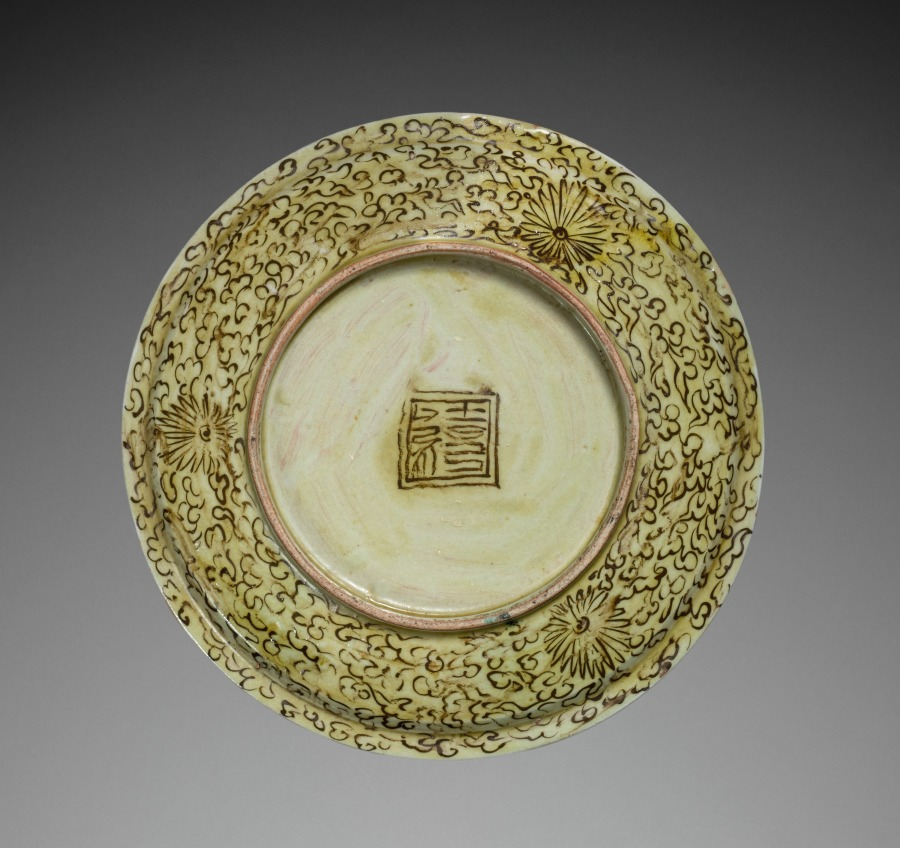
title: Plate with Fan Designs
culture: Japan, Edo period (1615–1868)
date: late 1600s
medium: porcelain with overglaze enamel decoration (Hizen ware, Ko-Kutani type)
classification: Ceramic